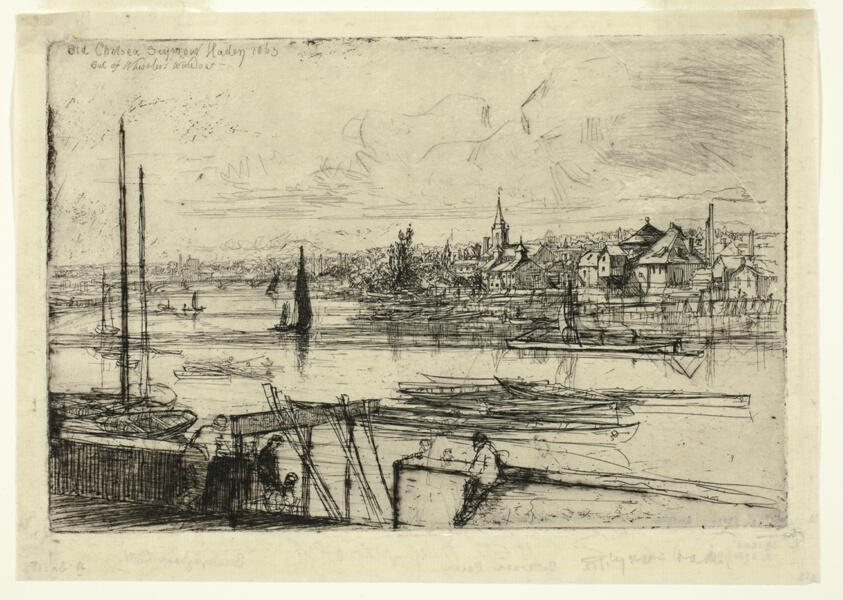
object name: Print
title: Battersea Reach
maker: Francis Seymour Haden (English, 1818-1910)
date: 1863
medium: Etching with drypoint in black on cream Japanese paper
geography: England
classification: etching; print; prints and drawing